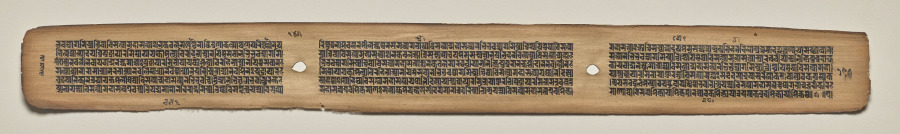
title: Text, Folio 145 (verso), from a Manuscript of the Perfection of Wisdom in Eight Thousand Lines (Ashtasahasrika Prajnaparamita-sutra)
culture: Eastern India, Bihar, Vikramashila Monastery. Painting: Nepal, Kathmandu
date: Sunday, September 14, 1119 (year 239 of the Newar Samvat in the month of Ashvina)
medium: gum tempera and ink on palm leaves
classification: Painting